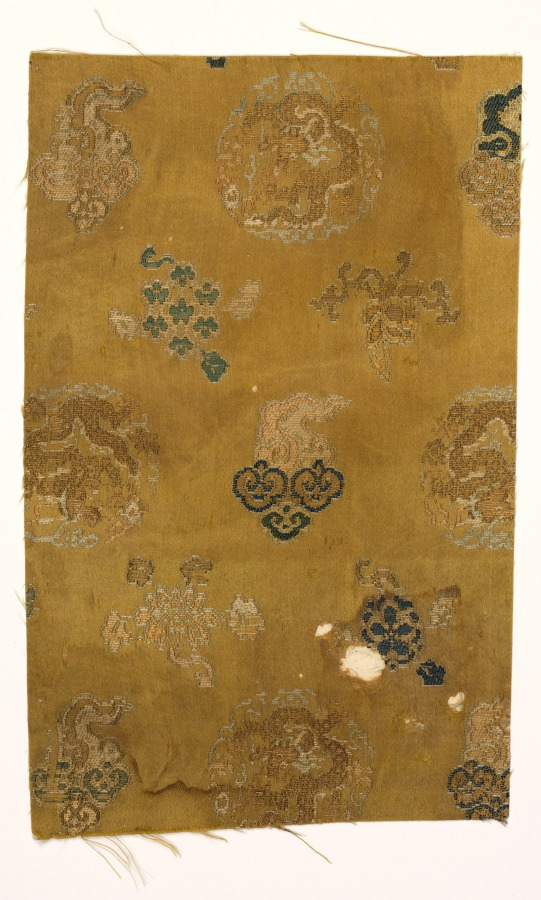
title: Fragment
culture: China, 18th century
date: 1700s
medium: brocaded satin, silk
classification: Textile